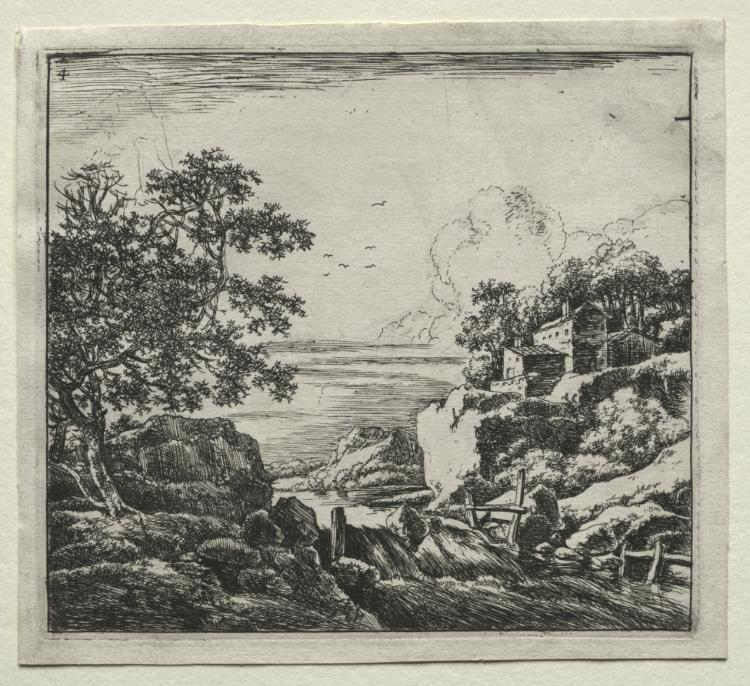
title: The Waterfall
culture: Flanders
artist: Herman Naiwincx (Flemish, c. 1624–after 1651)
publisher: Claude de Jongh (Dutch, c. 1600–1663)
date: 1640–51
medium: etching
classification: Print